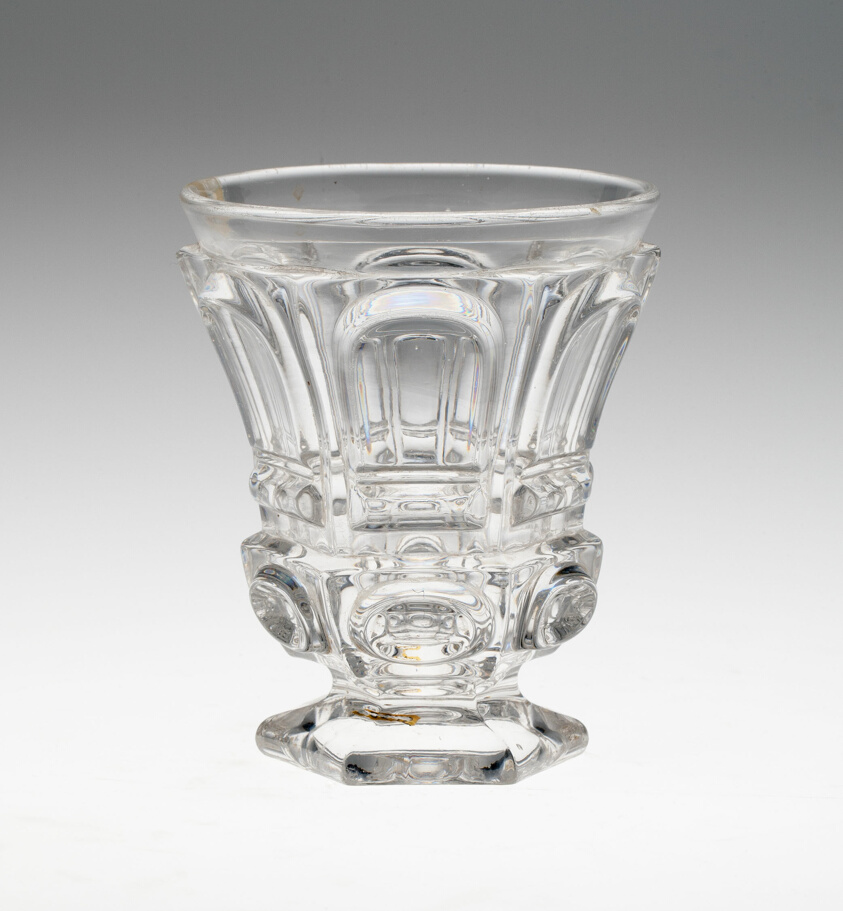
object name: Glass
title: Goblet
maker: Spain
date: Late 18th century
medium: Glass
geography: Spain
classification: drinking vessel; glass; european decorative arts